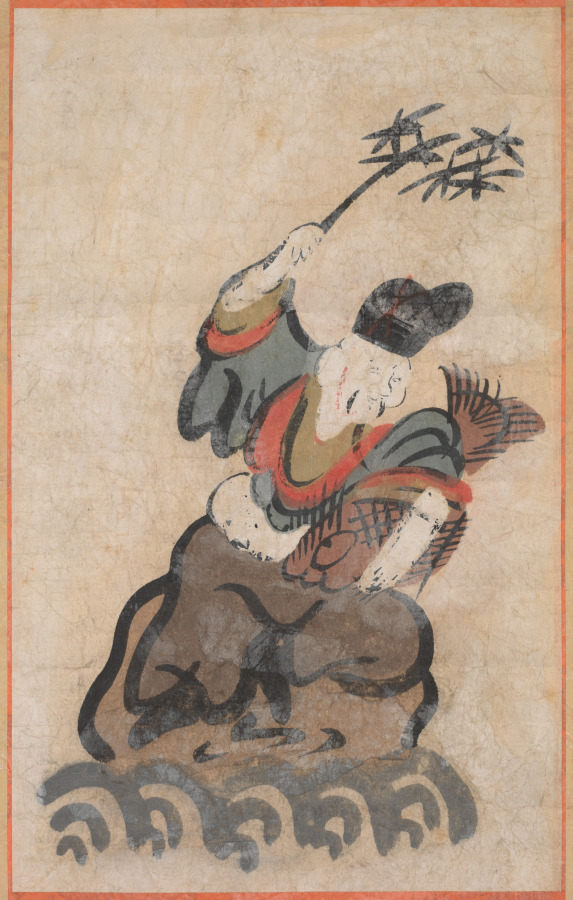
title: Ebisu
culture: Japan, Edo period (1615–1868)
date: 1800s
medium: hanging scroll, ink and color on paper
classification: Painting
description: Ebisu, one of the Seven Gods of Good Fortune, takes the guise of a Shinto priest who blesses his catch, a sea bream, with a branch of the camellia tree.